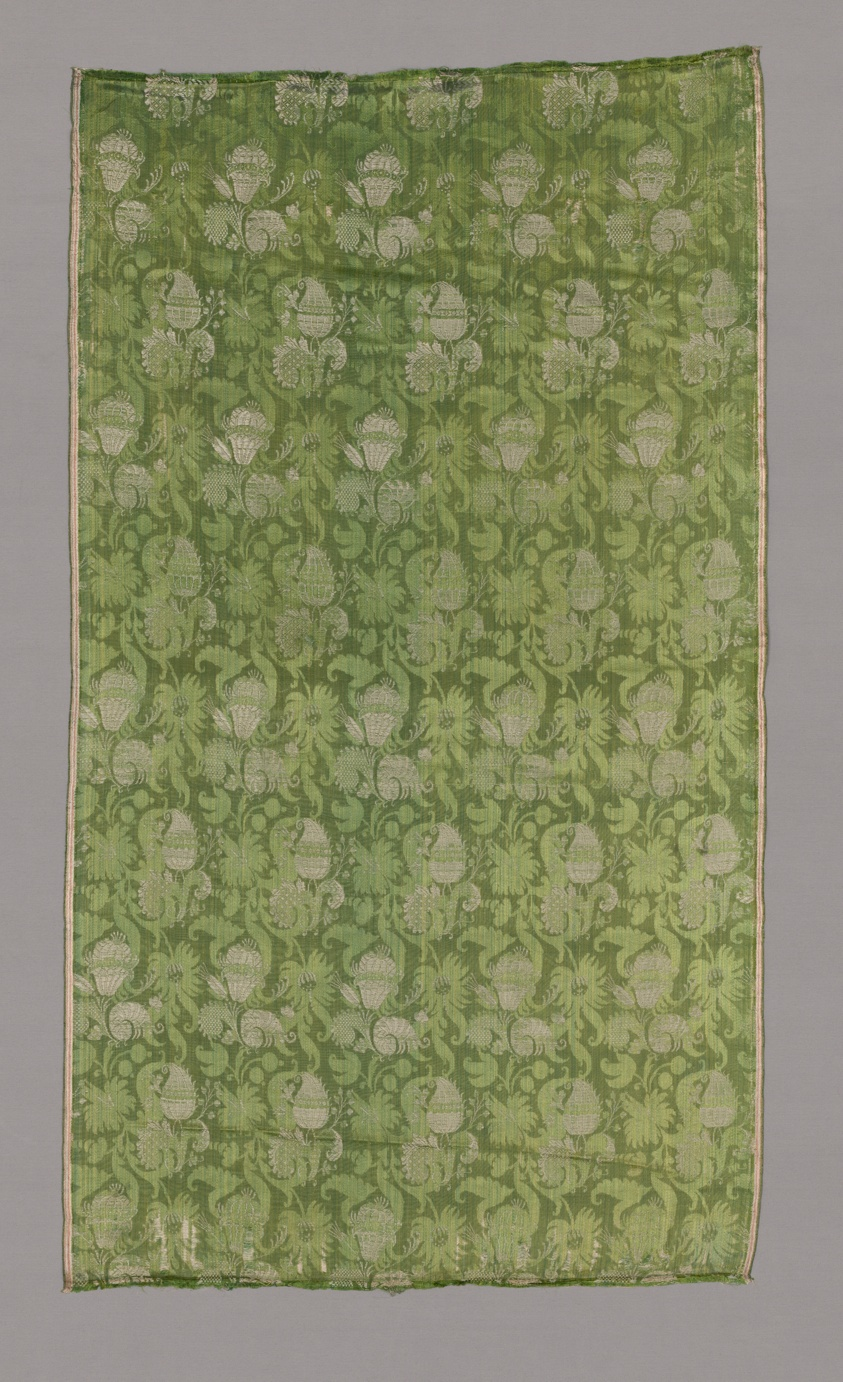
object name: Textile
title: Panel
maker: France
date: c. 1700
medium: Silk, integrated compound weave of complementary wefts in plain, satin, and twill interlacings; self-patterned by ground weft floats in satin weave areas; double cloth formed in pattern areas with plain weave on face and twill weave on reverse face; two panels joined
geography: France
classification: textile; weaving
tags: flowers, foliage